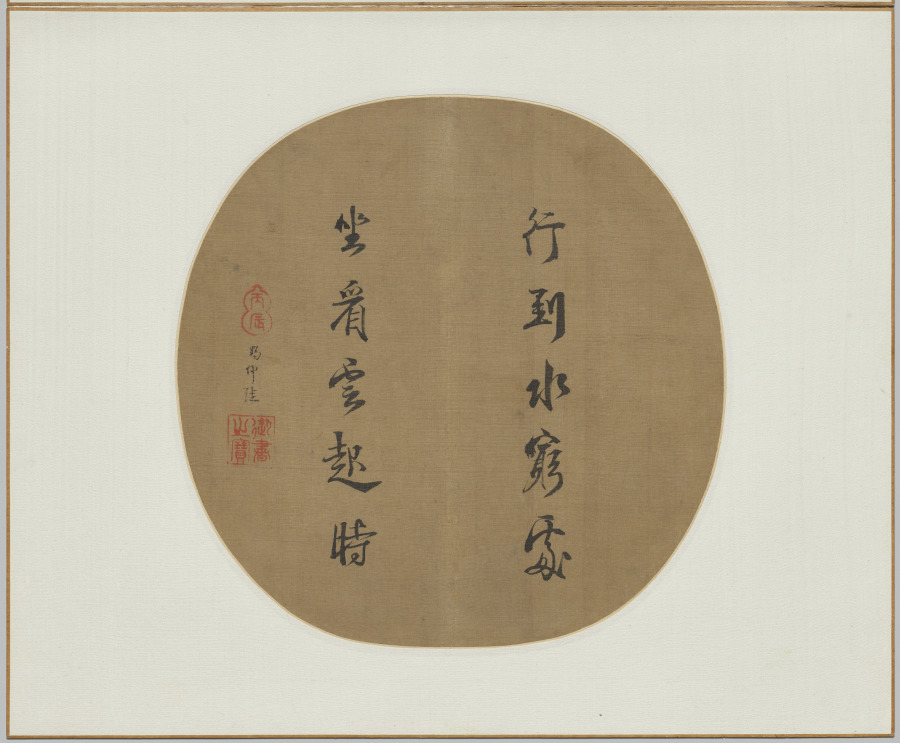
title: Poem by Wang Wei in the Cursive Script Style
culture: China, Southern Song dynasty (1127-1279)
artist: Song Lizong (Chinese, 1205–1264)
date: 1256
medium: Album leaf; ink on silk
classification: Calligraphy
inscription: 行到水窮處 坐看雲起時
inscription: The inscription between the two imperial seals reads, "Presented to Chung-kuei".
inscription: The top gourd-shaped seal has the cyclical date "bingchen" (丙辰 1256); the lower square seal is the Seal for Imperial Calligraphy.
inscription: The facing leaf has an inscription by Zhang Daqian 張大千 (1899–1983).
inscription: 1 seal of Chu Sheng-chai (20th Century) remounted onto the facing leaf to the left of the square calligraphy.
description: Poem and painting, once mounted together as one fan, exemplify the collaboration between imperial patron and court painter. Emperor Lizong’s calligraphy cites a verse from Wang Wei’s (701–761) poem, Walking to where the water ends, I sit and watch when clouds arise. Ma Lin’s response is this painting. At the water’s edge, a scholar reclines by a large rock. The view leads across the empty middle ground to a distant mountain. With sparse ink and subtly graded washes, Ma Lin visualizes the poetic verse. The painting suggests the impact of Chan aesthetics through interaction between the palace, literati-officials, and monasteries around Hangzhou. The leaf facing Emperor Lizong’s calligraphy has an inscription by Zhang Daqian (1899–1983).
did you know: Emperor Lizong had little interest in governmental affairs, but he was perhaps the finest calligrapher among the Song emperors.